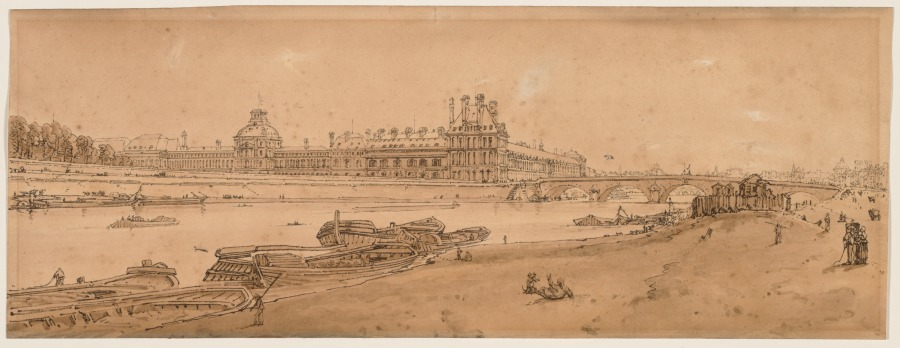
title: A Selection of Twenty of the Most Picturesque Views in Paris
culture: England, early 19th Century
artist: Thomas Girtin (British, 1775–1802)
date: 1802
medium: soft-ground etching with bistre wash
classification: Print